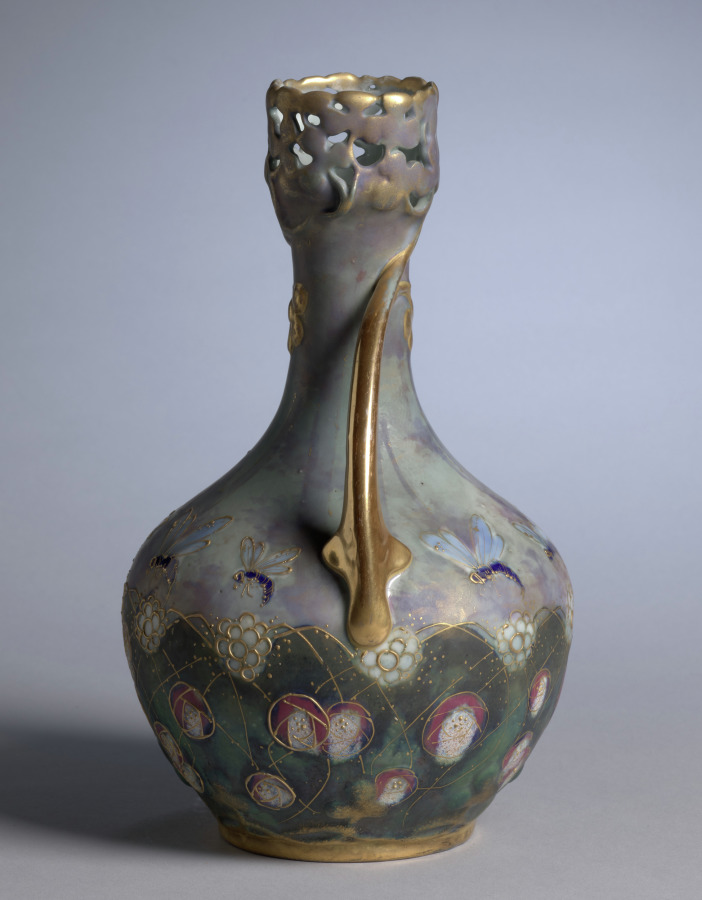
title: Vase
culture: Czech Republic, Turn-Teplitz, early 20th Century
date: c. 1900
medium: porcelain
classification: Ceramic